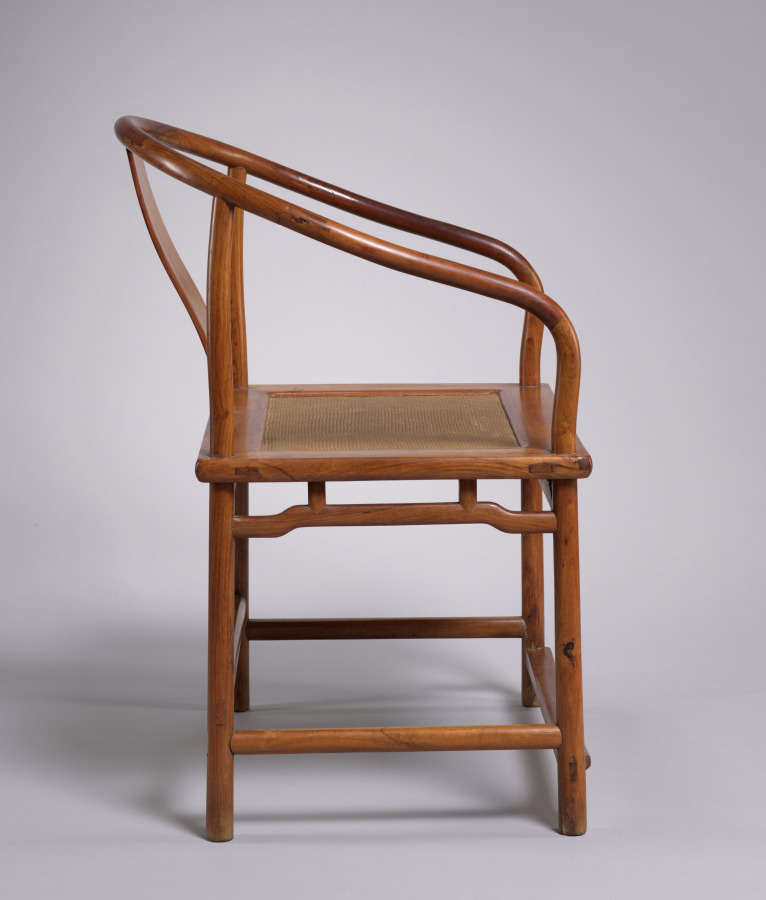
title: Roundback Armchair: Lohan Type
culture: China, Jiangsu province, Ming dynasty (1368–1644) or Qing dynasty (1644–1911)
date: 1600s–1700s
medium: Rosewood (huanghuali)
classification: Furniture and woodwork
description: In history, China moved from an original floor culture to high chairs and tables, developing a unique tradition of craftsmanship. Although still relatively unexplored, the manufacturing and styles of furniture differ by region. This horseshoe-back armchair was made in Jiangsu province. Its simplicity and minimalist elegance is characteristic of Suzhou-style furniture and aesthetics. The back of the chair is made of seven pieces of wood, joined and secured with an inserted wooden pin, a mortise-tenon technique that appeared in its earliest form in Neolithic fragments of the Hemudu culture.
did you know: Similar chairs with low, straight backs were presumably used by women or in a less formal context.